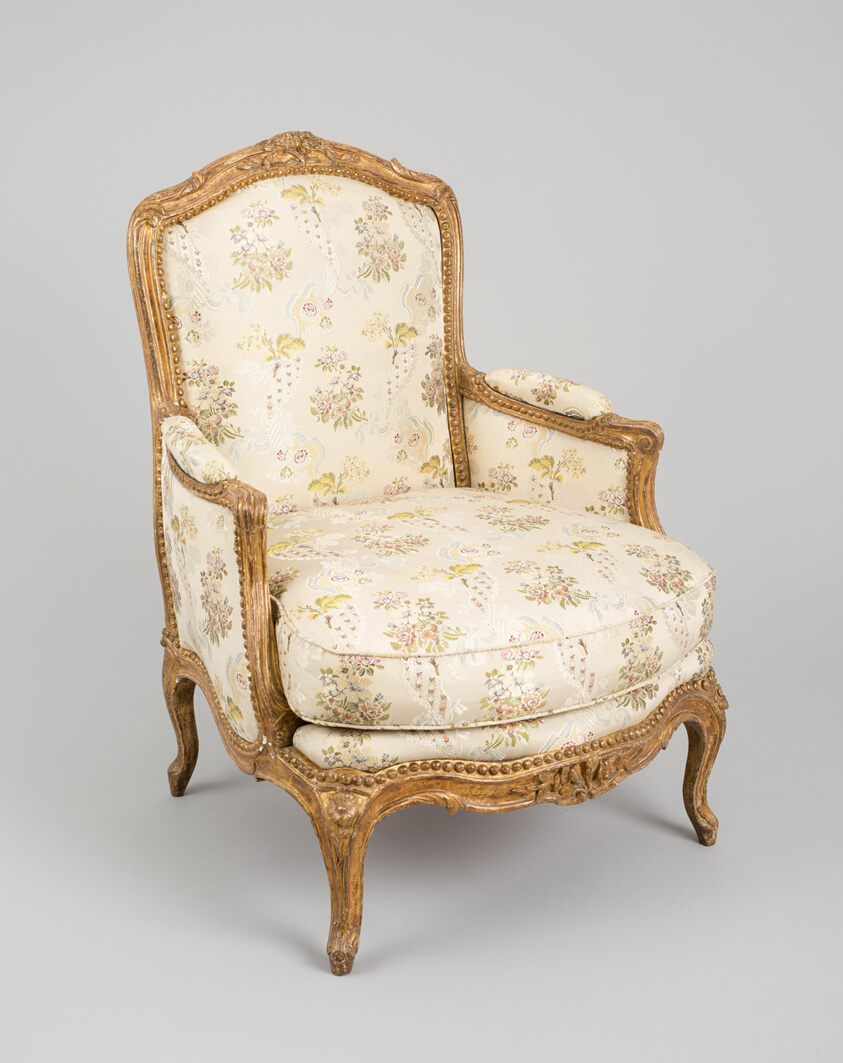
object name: Furniture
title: Armchair (Bergère à la Reine)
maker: Jacques Chenevat; French, 1736-1772; Paris, France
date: 1750/65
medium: Gessoed and gilded walnut, modern reproduction upholstery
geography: France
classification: seating; furniture; european decorative arts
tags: furniture